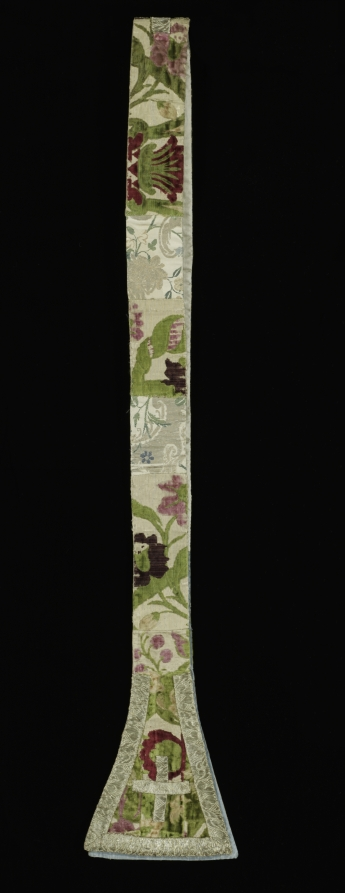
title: Stole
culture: Italy, Genoa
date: 1600s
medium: Velvet: cut and uncut, silk, metal thread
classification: Velvet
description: This sumptuous polychrome velvet displays a central vase with abundant flora and exotic leaves flanking curving blossoming fronds on a gilt-metal thread ground. The pattern was created with five colors of cut and uncut (loops) velvet pile. Only the pile warps for the lush green velvet occur across the entire cloth, while each additional color appears in vertical stripes—crimson, peach, rose, and purple. These widely acclaimed velvets from Genoa were the most colorful woven in Europe. Both the long stole and the shorter maniple are insignia of the office of deacons, priests, and the higher clergy. The stole was worn under a chasuble according to the office and the maniple was hung on the left forearm. The burse is a stiff receptacle in which the folded corporal, a white linen cloth on which the sacred bread and chalice are placed during the Mass, is carried to and from the altar. The upper fabric matches the chasuble, the bottom is a plain silk, and the interior has an obligatory linen lining.